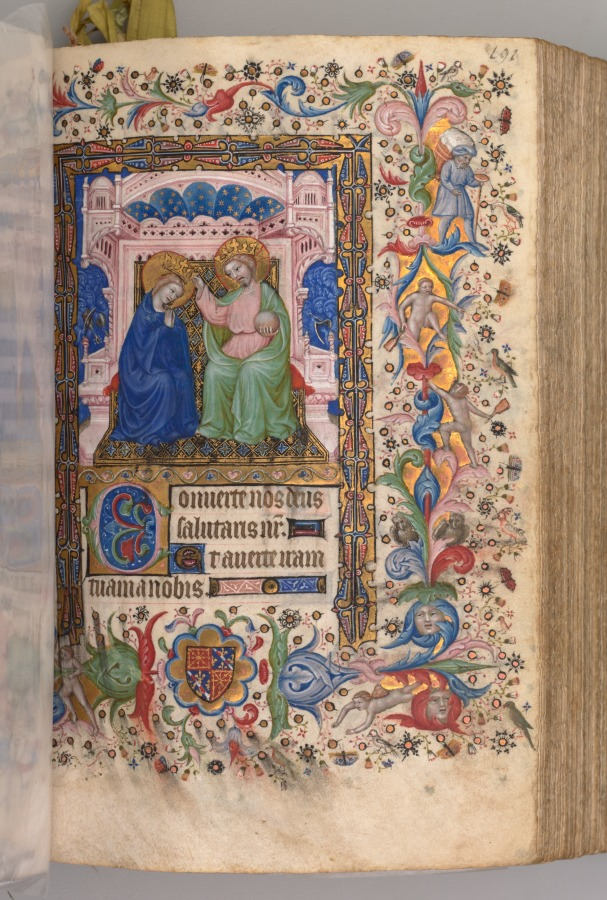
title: Hours of Charles the Noble, King of Navarre (1361-1425): fol. 96r, Coronation of the Virgin (Compline)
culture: France, Paris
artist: Master of the Brussels Initials and Associates (French)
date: c. 1405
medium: ink, tempera, and gold on vellum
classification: Bound Volume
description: This precious volume was obviously highly prized by its owner, the French-born King of Navarre, who had his coat of arms painted on no less than twenty folios. Rather than directly commissioning this manuscript from a specific workshop, it seems that Charles the Noble acquired his book of hours -- perhaps ready-made for the luxury market -- while on a trip to Paris in 1404-05. A collaborative effort, six painting styles are evidenced within the pages of this codex, those of two Italians, two Frenchmen, and two Netherlanders. The painter who was responsible for the planning and decoration of the book, and who produced seventeen of the large miniatures, was a Bolognese artist known as the Master of the Brussels Initials. His principal assistant, responsible for most of the borders, was a Florentine who signed his name "Zecho" da Firenze on folio 208 verso.